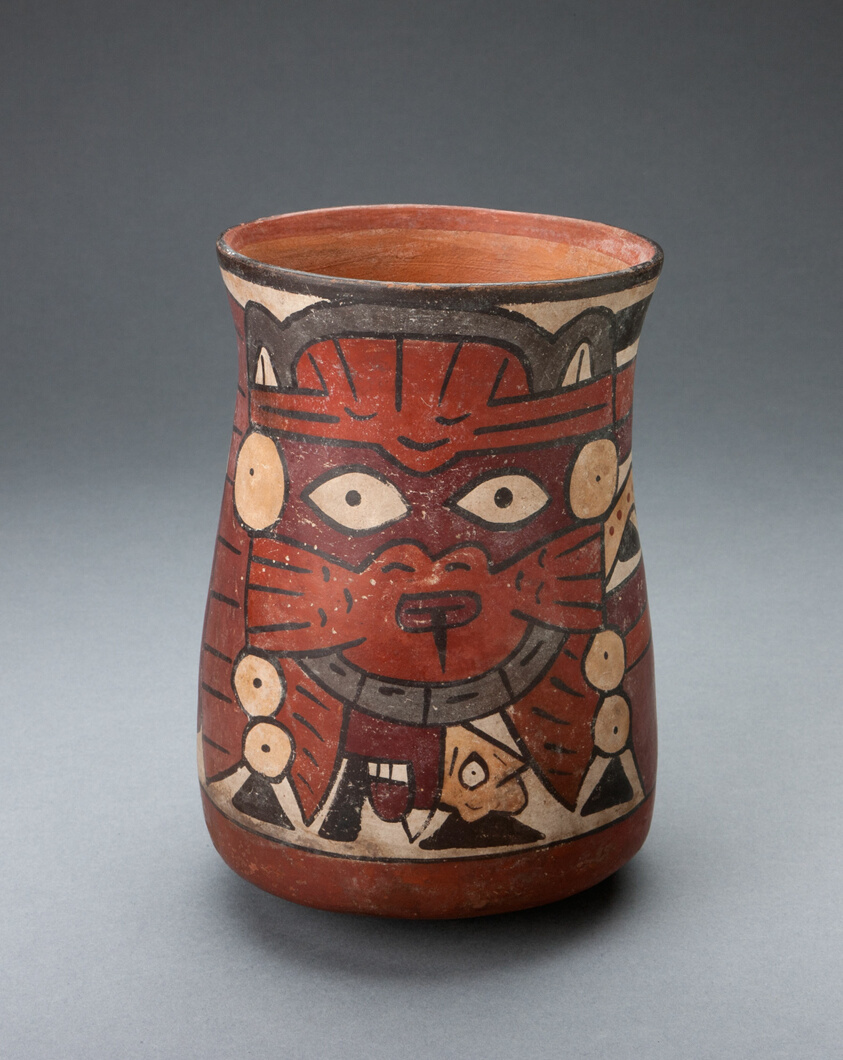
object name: Vessel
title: Beaker Depicting a Costumed Performer Holding Decapitated Head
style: nazca, early intermediate period, Pre-Columbian, americas, Arts of the Americas, andean, andes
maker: Nazca; South coast, Peru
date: 180 BCE–500 CE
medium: Ceramic and pigment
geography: Nazca Valley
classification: earthenware; art of the americas; ceramics; vessel